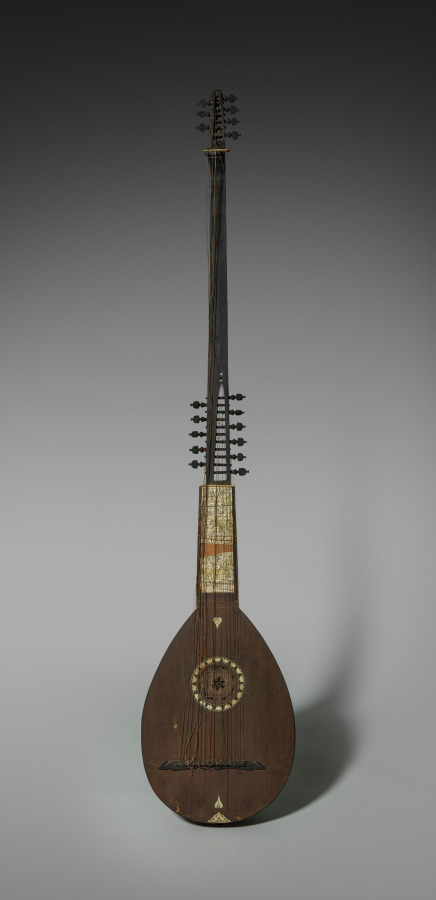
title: Chittarone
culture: Italy, late 17th century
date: late 1600s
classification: Musical Instrument